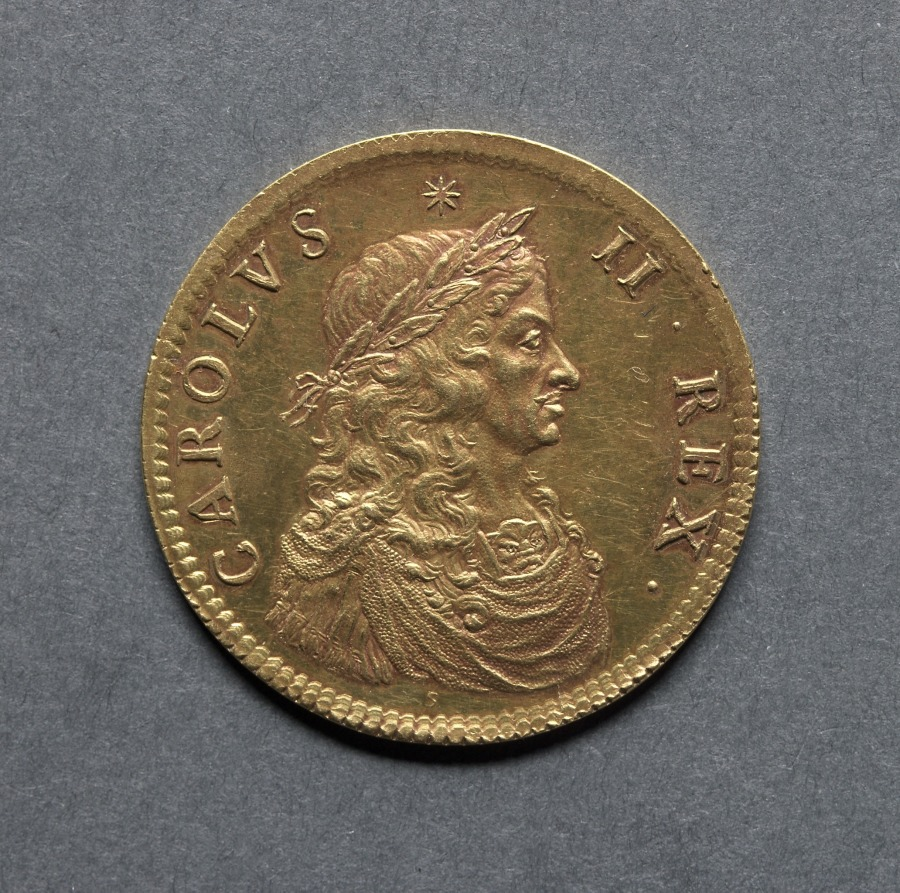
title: Broad: Charles II (obverse); Shields (reverse)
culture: England, Charles II, 1660-1685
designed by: Thomas Simon (British, c. 1623–1665)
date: 1660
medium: gold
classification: Coins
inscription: CAROLVS * II . REX .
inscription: 1660 MAG MALI A·DEI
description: The hammered series of English coins was now nearing its end. In 1662 and from that time forward, all coins were produced by the mill and screw press, which gradually developed into modern minting machinery. From 1660 till 1662 hammered coins were still produced while the Mint was being reformed. In preparing the designs for the new mill coinage many pattern pieces were produced, of which this rare and exceptionally attractive piece is one.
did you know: The shields on the reverse show England, Scotland, France, and Ireland in a cruciform shape with crowned interlocked Cs in between.